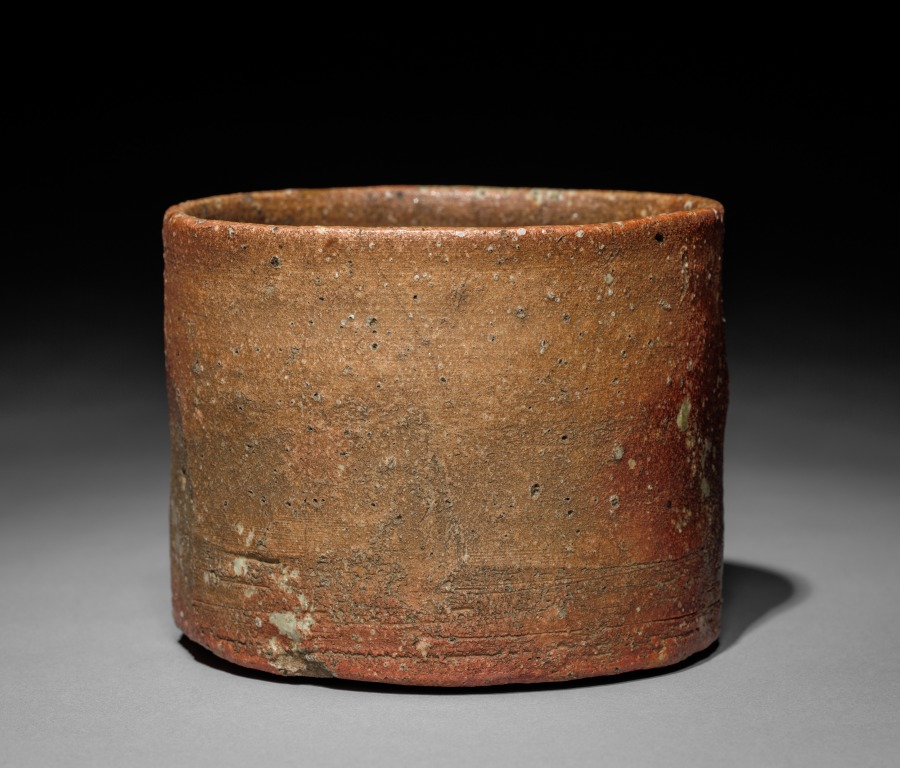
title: Tea Bowl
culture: Japan, Edo period (1615–1868)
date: 1600s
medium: stoneware with natural ash glaze (Shigaraki ware)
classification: Ceramic